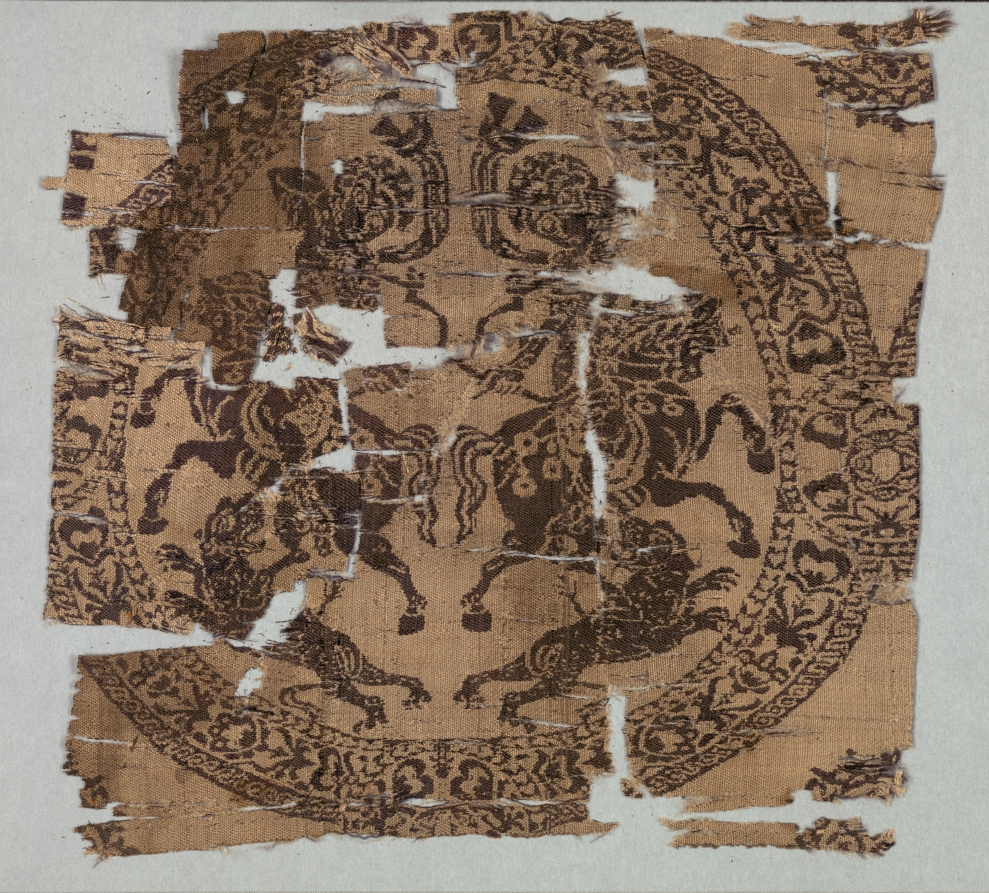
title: Roundel with Amazons, from a tunic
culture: Egypt or Syria(?)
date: 600s–800s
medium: samite: silk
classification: Textile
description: Within a roundel are a pair of mounted Amazons (women warriors) shooting backward at lions, which attack their running horses. The roundel frame is filled with stylized floral motifs and is bordered on the inside by a band of tiny hearts.